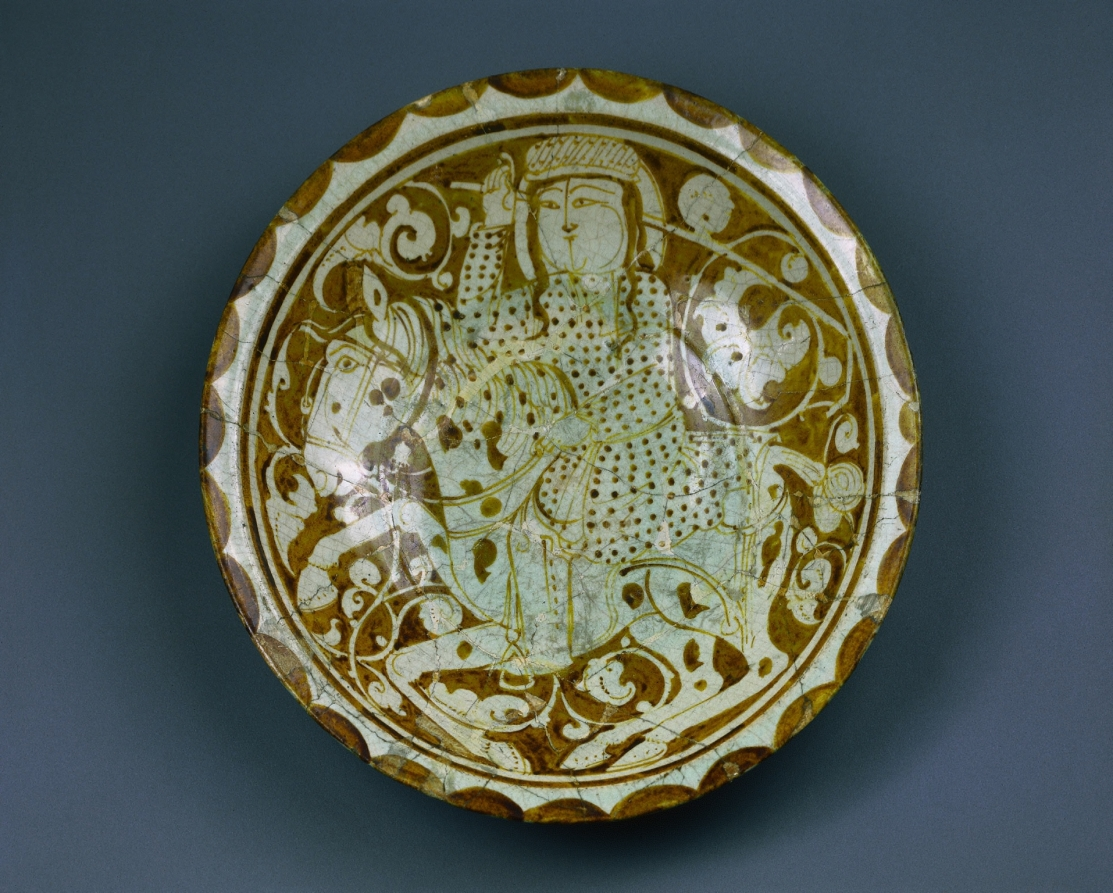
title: Luster Dish with Polo Player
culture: Iran, Seljuq period (1037–1194)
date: 1170–1200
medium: fritware with luster-painted design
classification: Ceramic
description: Luster potters migrated to the city of Kashan in Iran where luster ware reached its greatest height during the 1170s until about 1220. This masterful dish features a mounted polo player, a figure representing the Iranian ideal of beauty with a round moon-like face and fine features.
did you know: Where fine clay was unavailable, potters made a paste out of ground quartz, clay, and glass. When fired, the paste created a compact white material called fritware that approximated the appearance of porcelain.